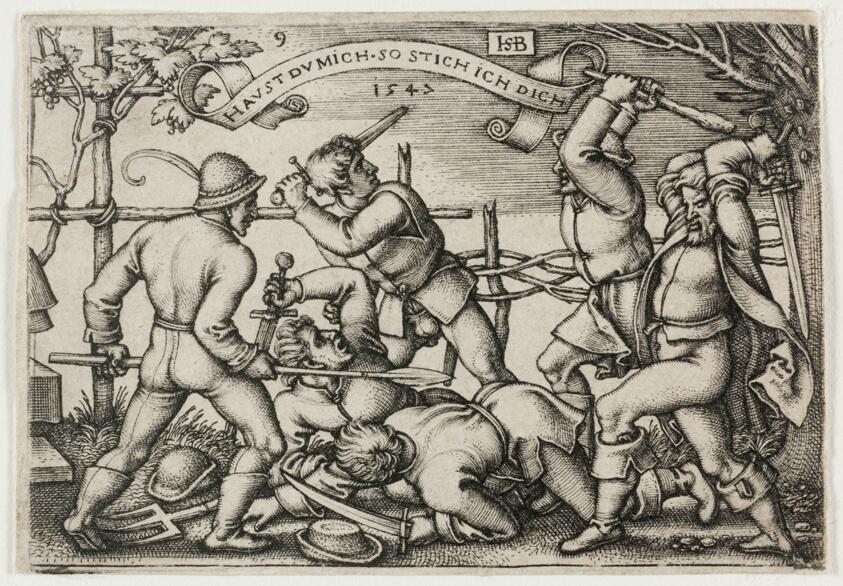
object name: Print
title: Peasants' Brawl, plate 9 from The Peasants' Feast or the Twelve Months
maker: Sebald Beham; German, 1500-1550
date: 1547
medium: Engraving in black on ivory laid paper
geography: Germany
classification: engraving; print; prints and drawing